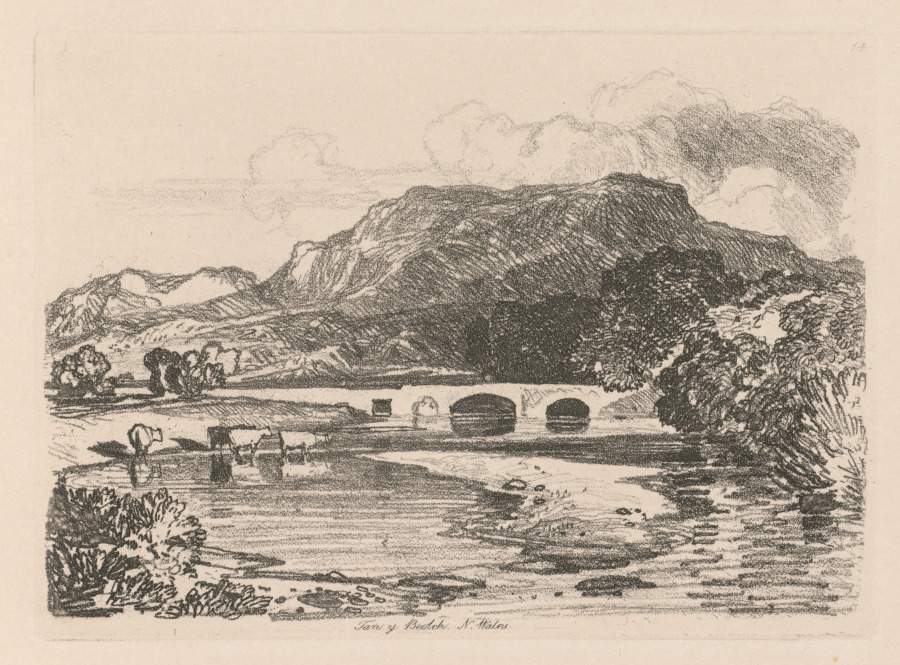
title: Liber Studiorum: Plate 14, Tan-y-Bwlch, Merionethshire, North Wales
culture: England, 19th century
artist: John Sell Cotman (British, 1782–1842)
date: 1838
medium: softground etching, from a bound volume containing 48 plates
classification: Bound Volume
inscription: In plate, within image, upper right: 14; in plate, below image: Tan-y-Bwlch, N. Wales